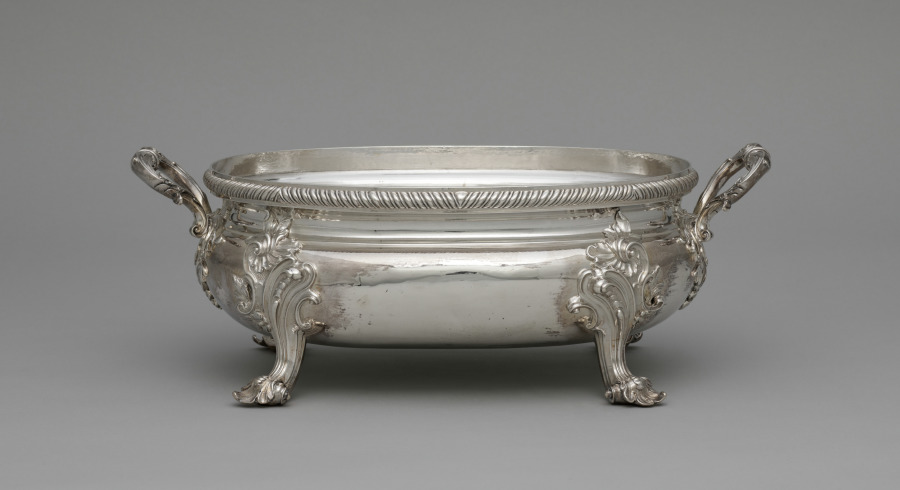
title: Tureen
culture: England, 18th century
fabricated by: Edward Wakelin (British, 1784)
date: 1753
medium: silver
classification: Silver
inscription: engraved coat of arms of Admiral Edward Vernon of Nacton (1684-1757) and his wife Sarah, daughter of Thomas Best. Engraved on cover is Vernon crest, a woman holding a scythe.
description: A very successful silversmith, Edward Wakelin may have been more a businessman than a craftsman or designer.